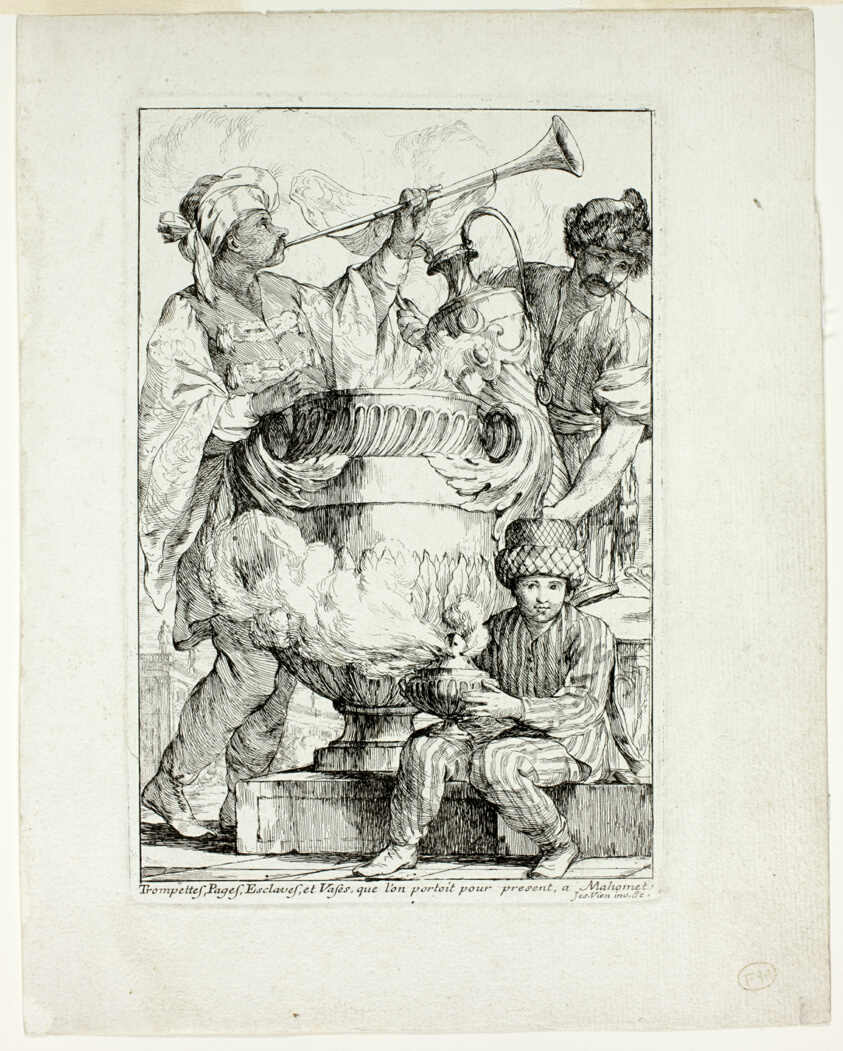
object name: Print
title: Trompettes, Pages, Esclaves, et Vases que l'on portait pour présent à Mahomet, from Caravanne du Sultan à la Mecque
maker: Joseph-Marie Vien, the elder; French, 1716–1809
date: 1748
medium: Etching on ivory laid paper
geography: France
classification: etching; paper; print; prints and drawing